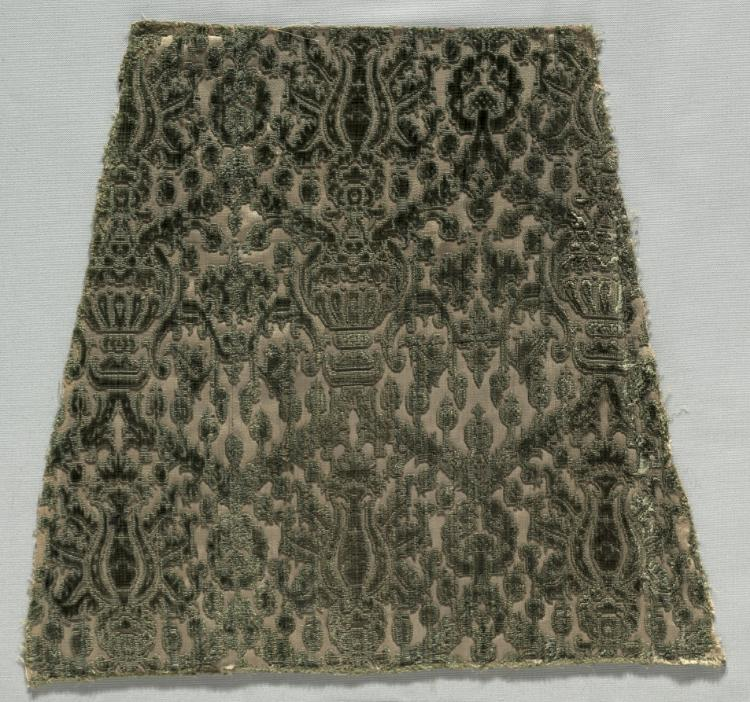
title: Velvet Fragments Sewn Together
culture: Italy, late 16th century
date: late 1500s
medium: velvet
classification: Velvet